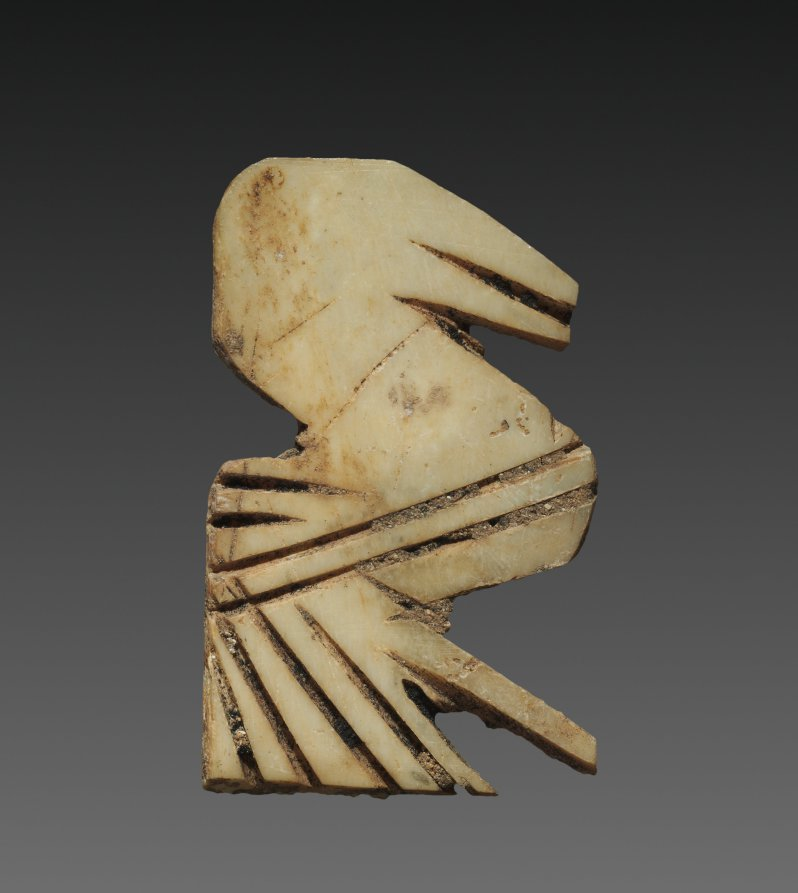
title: Stylized Bird: Decorative Inlay for a Box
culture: Israel, possibly Jericho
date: c. 2000 BCE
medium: bone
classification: Ivory